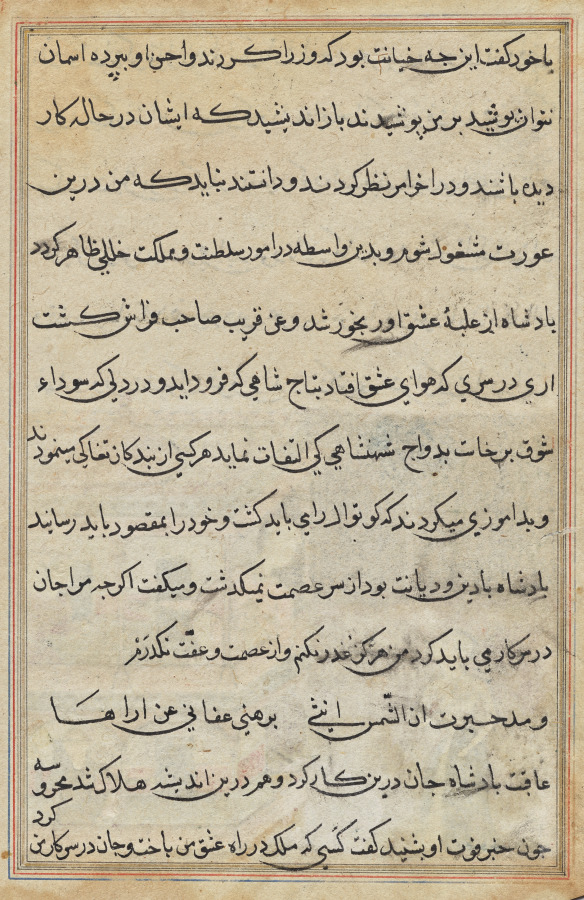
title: Page from Tales of a Parrot (Tuti-nama): text page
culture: Mughal India, court of Akbar (reigned 1556–1605)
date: c. 1560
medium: gum tempera, ink, and gold on paper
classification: Painting